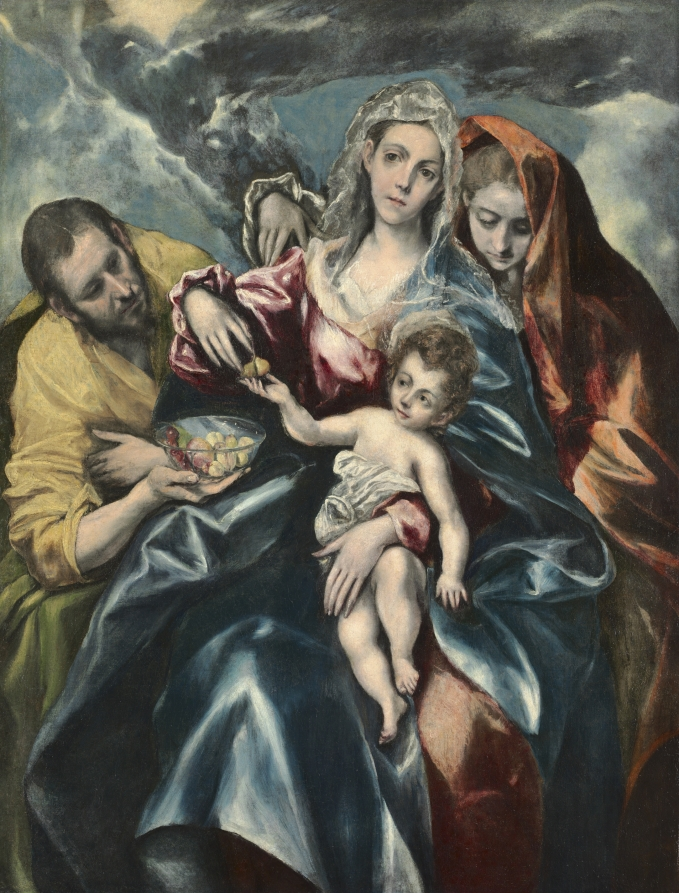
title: The Holy Family with Mary Magdalen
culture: Spain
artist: El Greco (Spanish, 1541–1614)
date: c. 1590–95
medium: oil on canvas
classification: Painting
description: The seemingly weightless figures, the startling color combinations, and the moody, imprecise setting all show El Greco’s interest in conveying the intense spirituality of these figures rather than their concrete reality. Above all, the painting addresses Mary’s role as mediator between Christ and the viewer. She supports her son, but her faraway look indicates awareness of his fate. Mary feeds Jesus fruit held by Joseph that is full of symbolic meaning, with the apple representing the fall of man; cherries, the blood of Christ; peaches, salvation; and pears, the sweetness of Christ’s virtue.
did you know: The nearly levitating body of the Christ child further emphasizes the ethereal setting of the Holy Family.